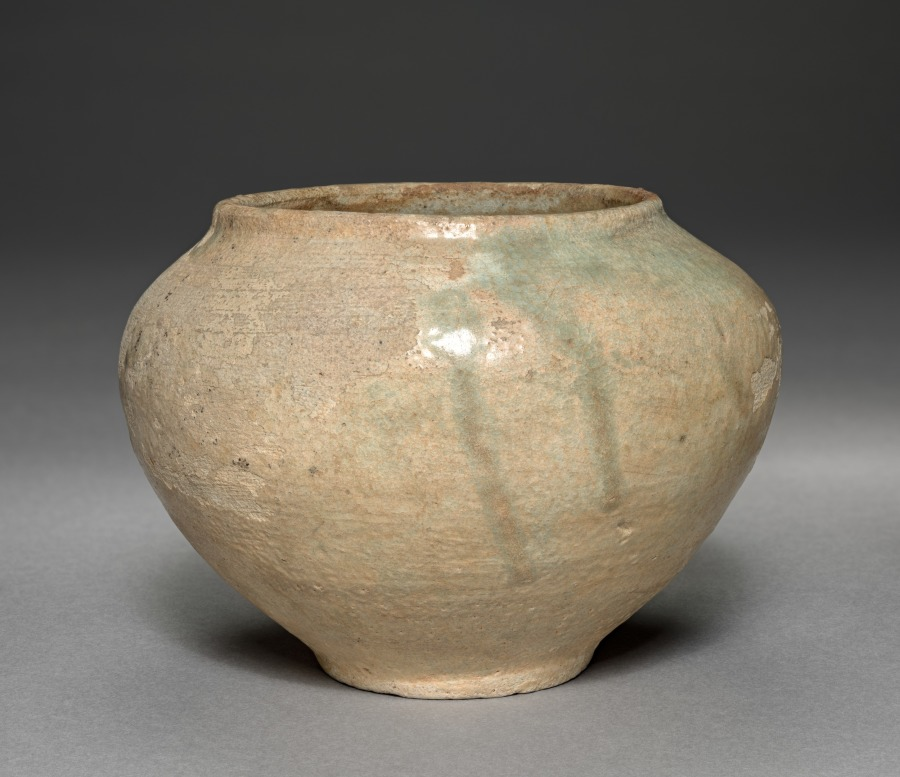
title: Jar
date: 1100s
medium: Pottery, glazed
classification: Ceramic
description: This jar is one of the rare porcelain examples from the Goryeo period (918–1392). In Korea at that time, both celadons and porcelains were produced in the same kilns, explaining why this porcelain jar bears a greenish blue glaze.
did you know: This jar is one of the rare porcelain examples from the Goryeo period (918–1392).